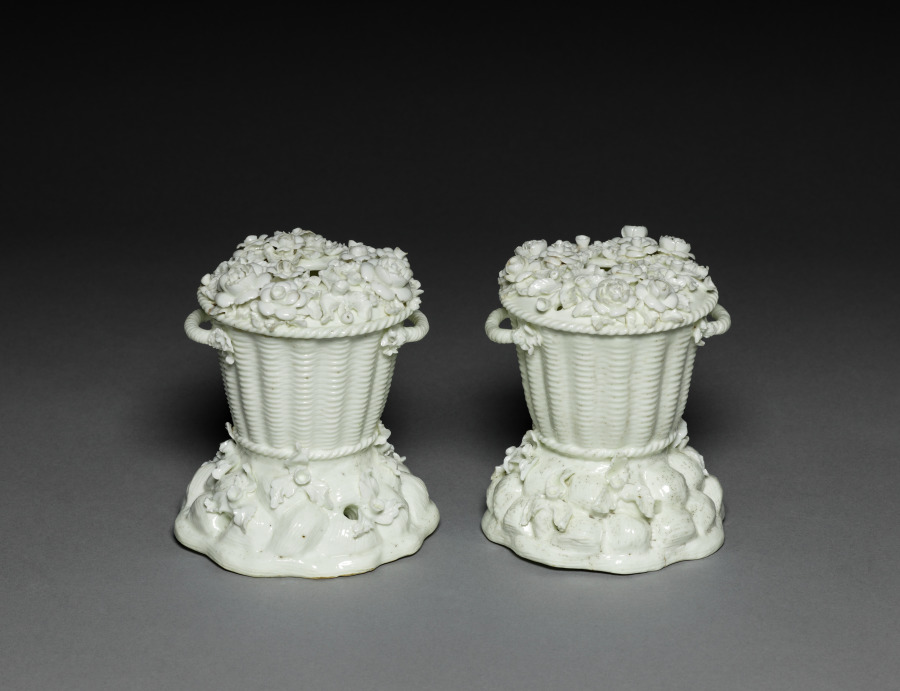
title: Pair of Potpourri Vases with Covers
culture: France, Saint Cloud, 18th century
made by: Saint Cloud Porcelain Factory (French)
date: c. 1740–60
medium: soft-paste porcelain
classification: Ceramic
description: As beautifully designed objects, the function of these vases is not immediately apparent. Created to contain potpourri, a mixture of flowers, herbs, and spices emitting ambient fragrance, their covers are decorated with delicate flowers spaced by small, unobtrusive perforations. The decoration continues onto the body of the container where intricate ribbing emulates a basket weave.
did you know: The holes in the base of these vases may have held gilt-bronze flowering stems.